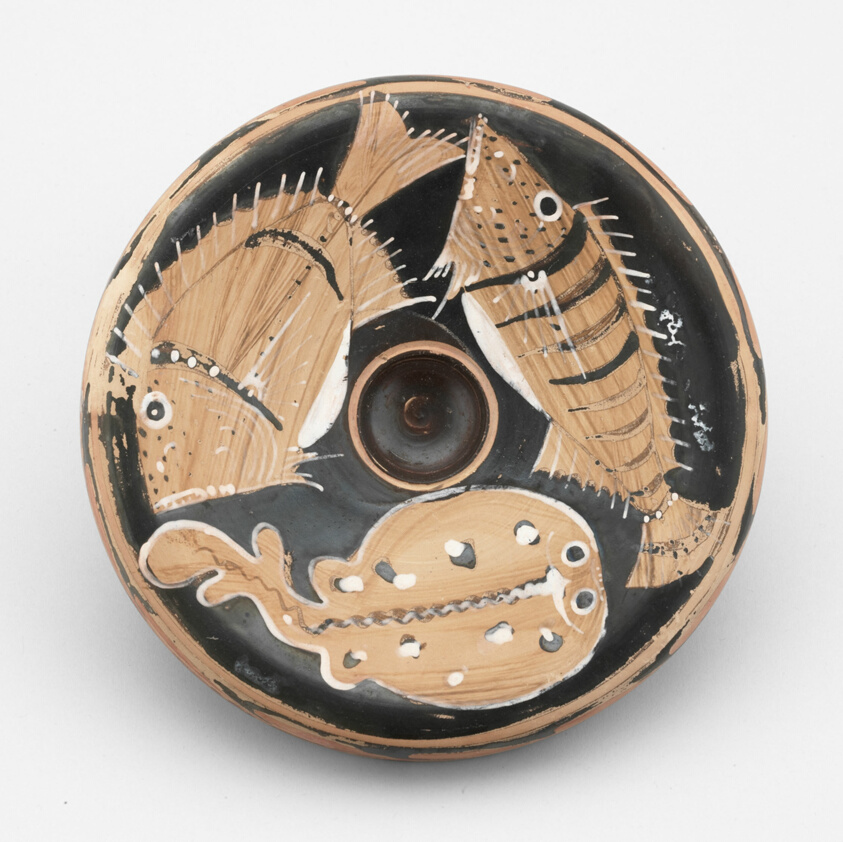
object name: Vessel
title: Fish Plate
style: red-figure, ancient, greek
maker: Attributed to the Dotted Stripe Painter; Greek; Campania, Italy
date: 350-330 BCE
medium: terracotta, red-figure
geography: Campania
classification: plate (general, dish); ancient art; dish (vessel); earthenware; vessel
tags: fish